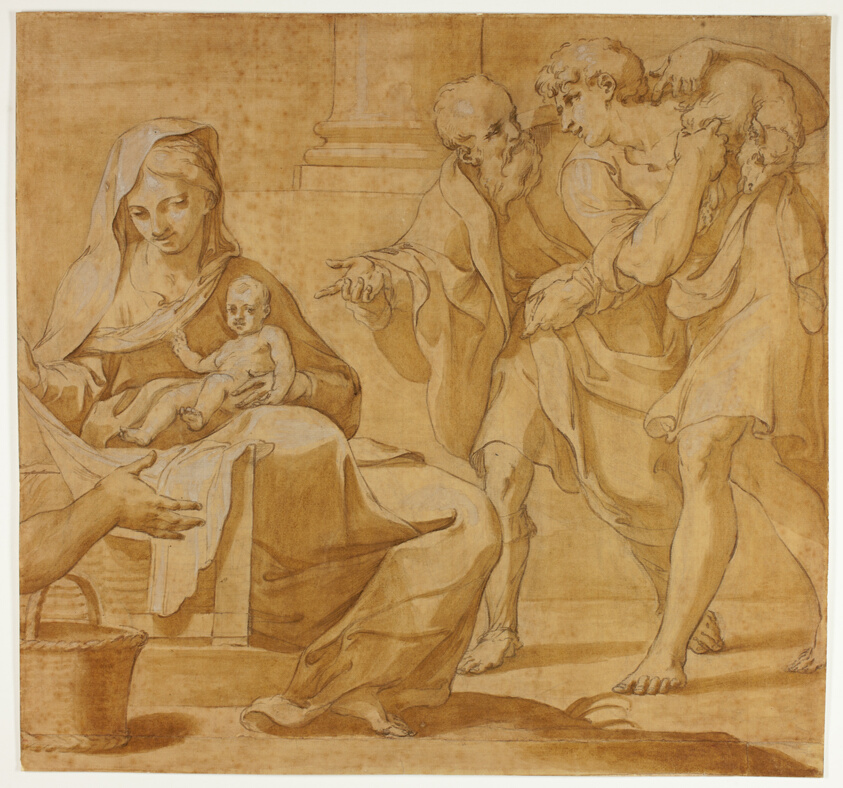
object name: Drawing and Watercolor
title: Adoration of the Shepherds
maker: possibly after Guido Reni (Italian, 1575-1642); or Style of Domenico Piola (Italian, 1627-1703)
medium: Pen and brown ink with brush and brown wash, heightened with white gouache, over black chalk on brown laid paper, laid down on ivory laid paper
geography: Italy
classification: ink or chalk wash; drawings (visual works); prints and drawing